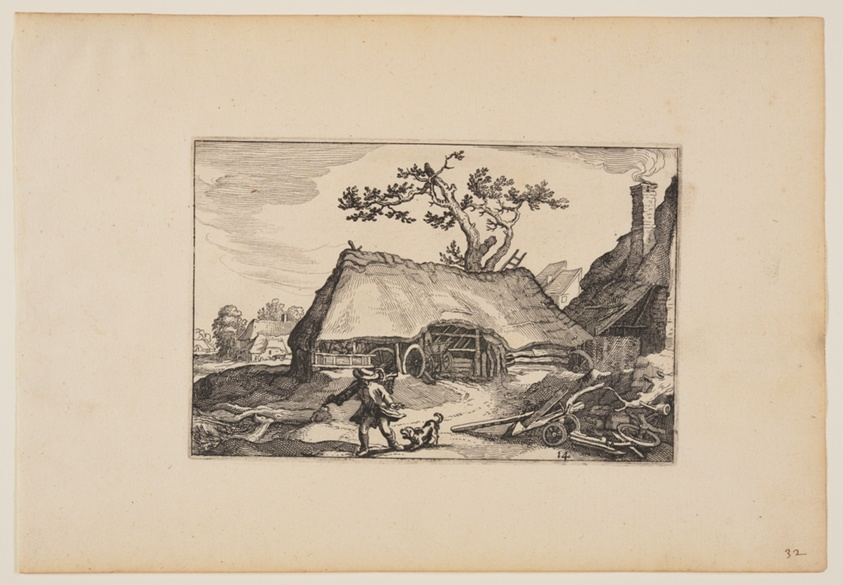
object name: Print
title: Farm with Shed for a Cart, Man with Barking Dog, from Landscapes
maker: Claes Jansz. Visscher (Netherlandish, c. 1550–c. 1612); after Abraham Bloemaert (Dutch, 1566–1651)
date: 1620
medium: Etching on ivory laid paper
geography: Netherlands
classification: print; paper; prints and drawing; etching